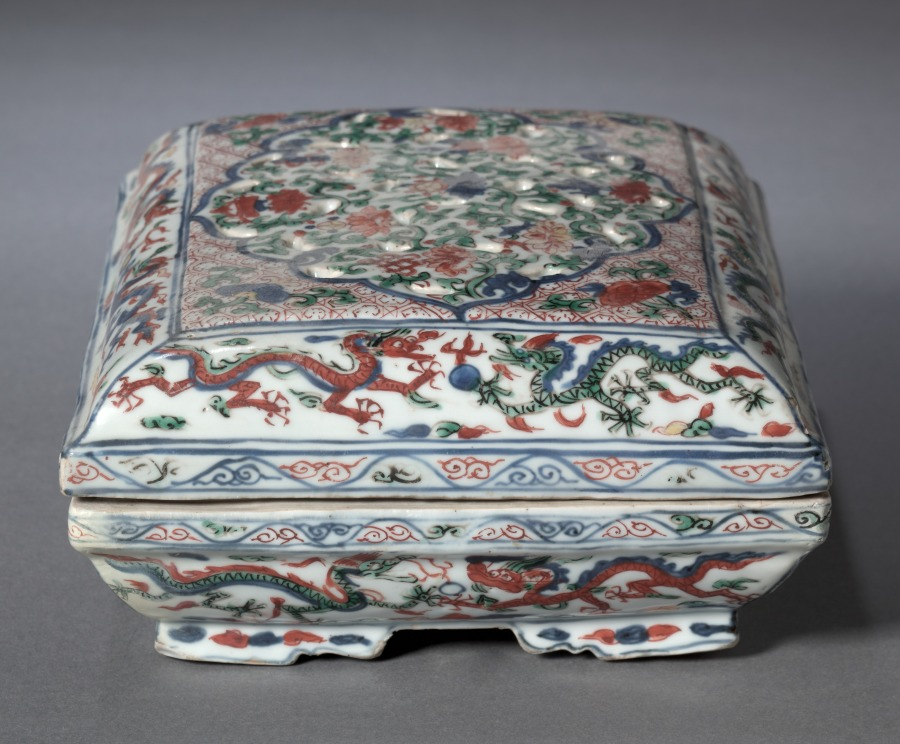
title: Box with Cover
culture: China, Jiangxi province, Jingdezhen kilns, Ming dynasty (1368-1644), Wanli reign (1572-1620)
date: 1573–1620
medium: porcelain with wucai (five color) overglaze enamel decoration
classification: Ceramic